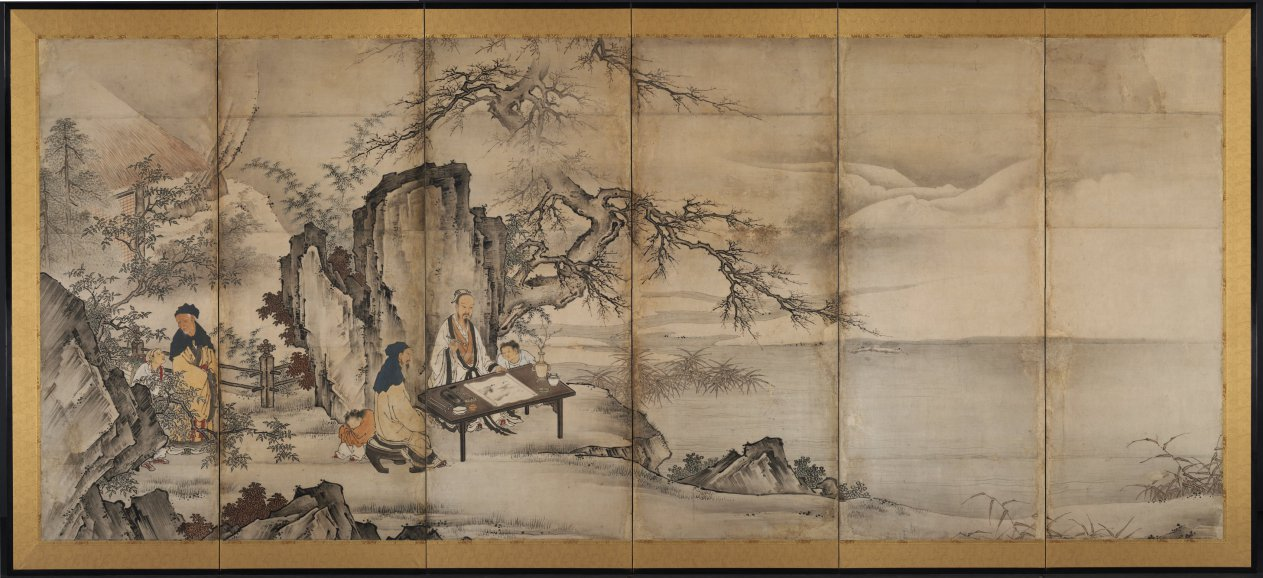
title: The Four Accomplishments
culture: Japan, Momoyama period (1573–1615)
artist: attributed to Kano Shōei (Japanese, 1519–1592)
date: late 1500s–early 1600s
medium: One of a pair of six-panel folding screens; ink and slight color on paper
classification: Painting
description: This is one of a pair of screens showing a group of elite Chinese gentlemen and their servants in the countryside. One man is considering his painting-in-progress. Historically, practicing or admiring painting was considered a skill essential for cultured men in China.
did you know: Although the painter captures his companion's attention, his young servant is having a nap.